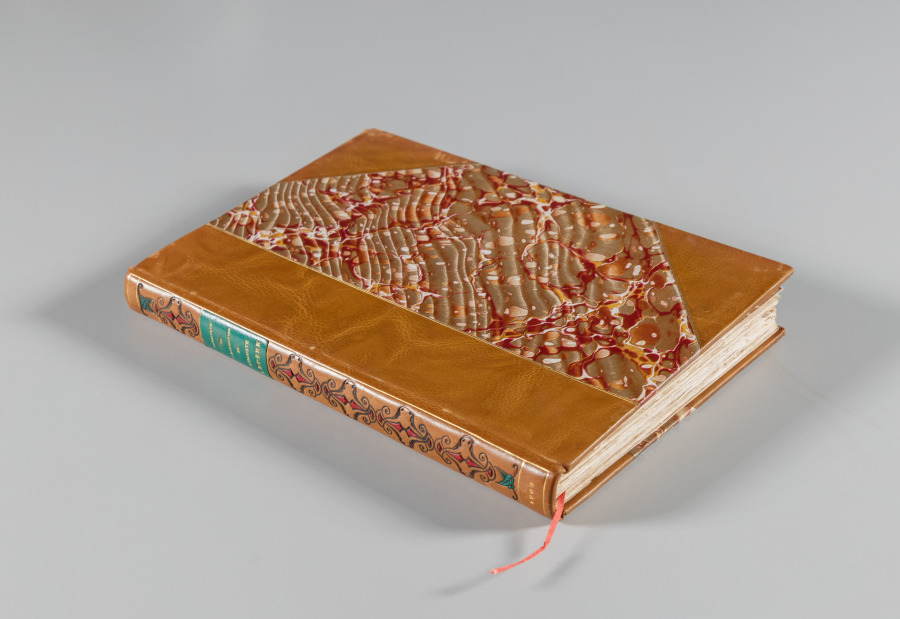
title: Catalogue de L'Exposition de August Lepère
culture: France, 20th century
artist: Auguste Louis Lepère (French, 1849–1918)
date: 1908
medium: Leather-bound volume containing two etchings and one lithograph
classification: Bound Volume